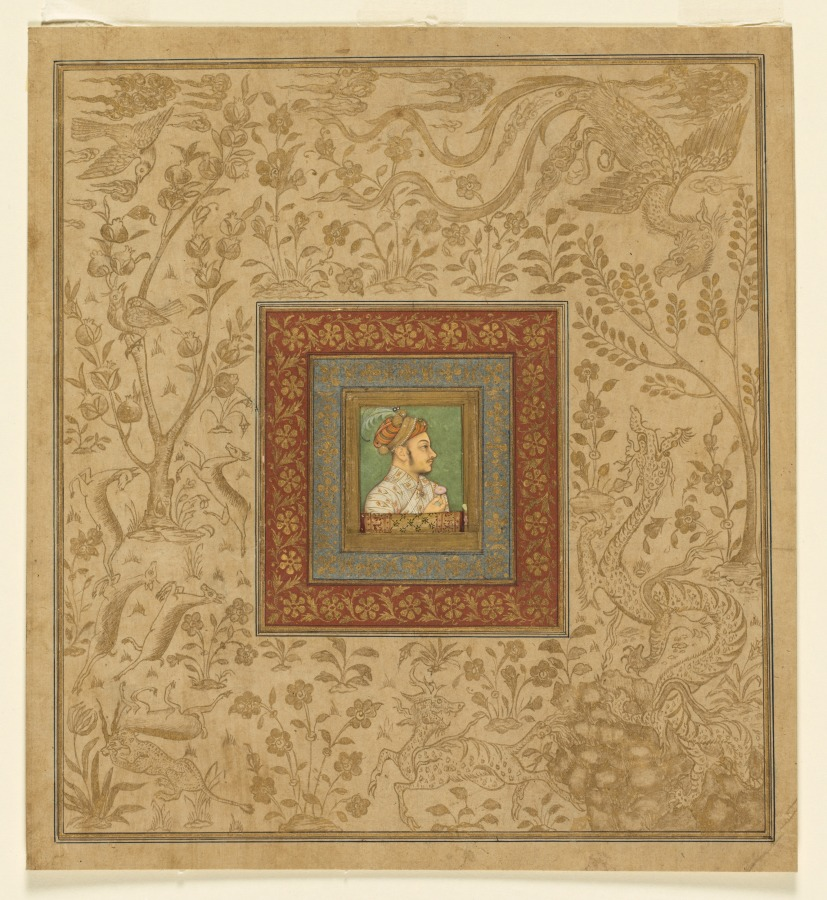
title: Portrait of Murad Bakhsh (1624–61)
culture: Mughal India, court of Shah Jahan (reigned 1628–58)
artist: attributed to Balchand (Indian, active 1595–c. 1650)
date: c. 1635; borders c. 1700s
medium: gum tempera and gold on paper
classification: Painting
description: The miniature portrait of a Mughal prince is now mounted on an album page. Originally, it was in a gemstone setting as a “portrait jewel” to be worn by family and supporters at court. India’s ruling elite had been wearing portrait jewels since Sir Thomas Rowe (about 1581–1655) presented British portrait miniatures and cameos to the Mughal emperor as part of a diplomatic gift in 1616, when he successfully negotiated for British access to India’s ports.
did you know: This portrait belonged to a cousin of Sir Winston Churchill.